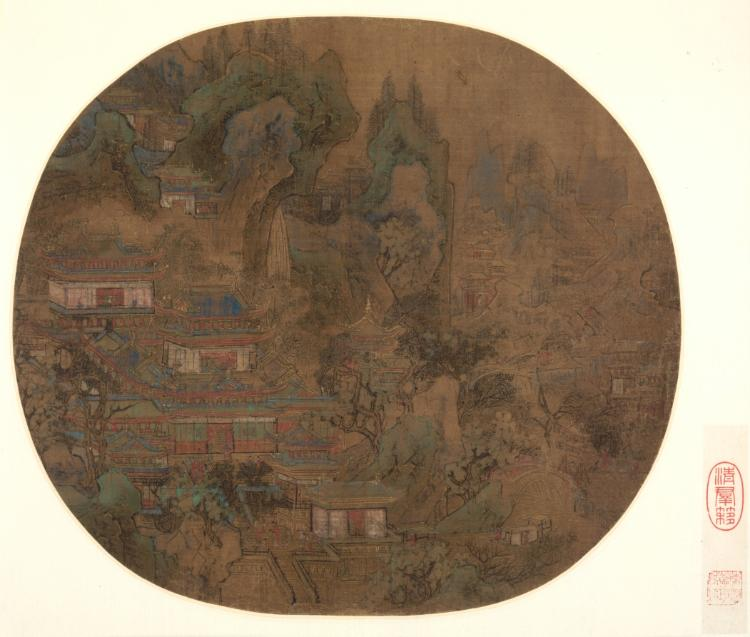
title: Palace Landscape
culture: China, Northern Song dynasty (960–1127)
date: 1000s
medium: album leaf; ink, color, and gold on silk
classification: Painting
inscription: 2 unidentified seals on mounting.